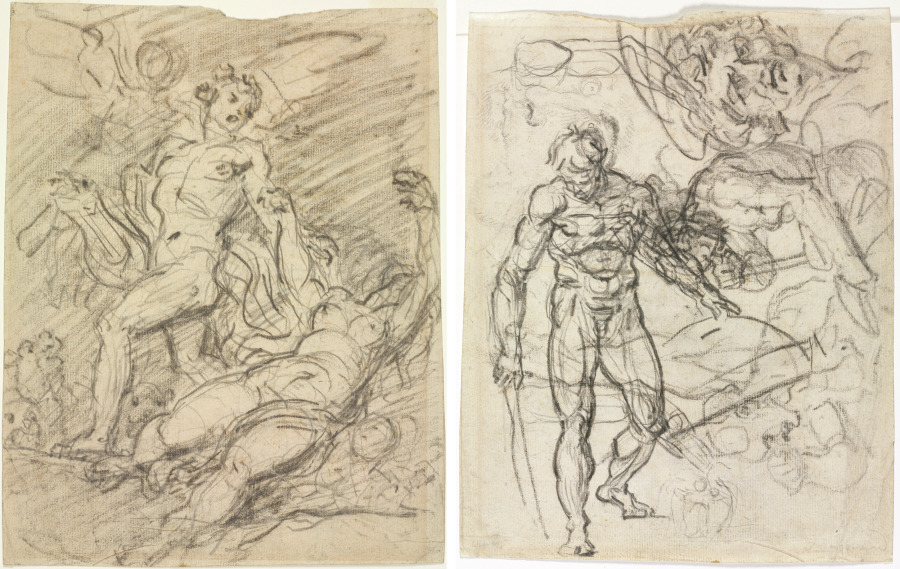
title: Orpheus and Eurydice (recto); Figure Studies (verso)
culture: France, 18th century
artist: Jean-Honoré Fragonard (French, 1732–1806)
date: c. 1761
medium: Black and gray chalks on cream laid paper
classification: Drawing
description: Quick drawings could serve a variety of purposes, and it is not always clear today why an artist created a particular sketch. This one may record a painting Fragonard saw during a journey to Italy, or capture an idea he was considering for a painting of his own. Orpheus, identified by the lute, grasps for his love Eurydice as she is pulled down into Hades. The snarling animals near his feet may represent Cerberus, the multiheaded guard dog of the underworld.